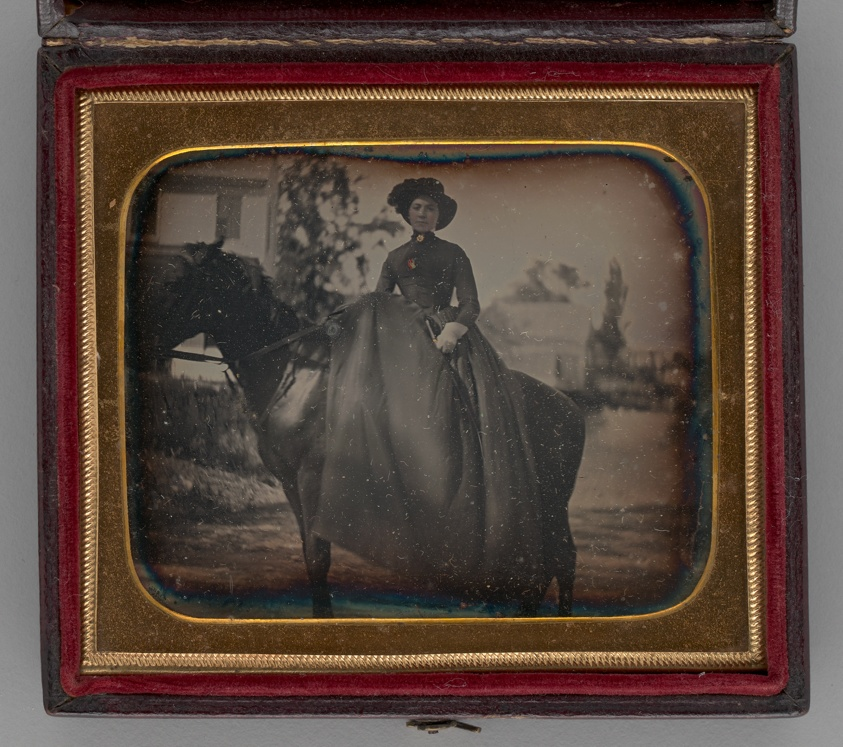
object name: Photograph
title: Untitled (Portrait of a Woman on a Horse)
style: 19th century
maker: Unknown maker; American, 19th century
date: 1850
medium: Daguerreotype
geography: United States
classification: portrait; photography; photographic process; photograph; daguerreotype; portrait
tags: lundberg collection, horseback riding, horses, portrait, portraits, woman, female, portraits: female subject